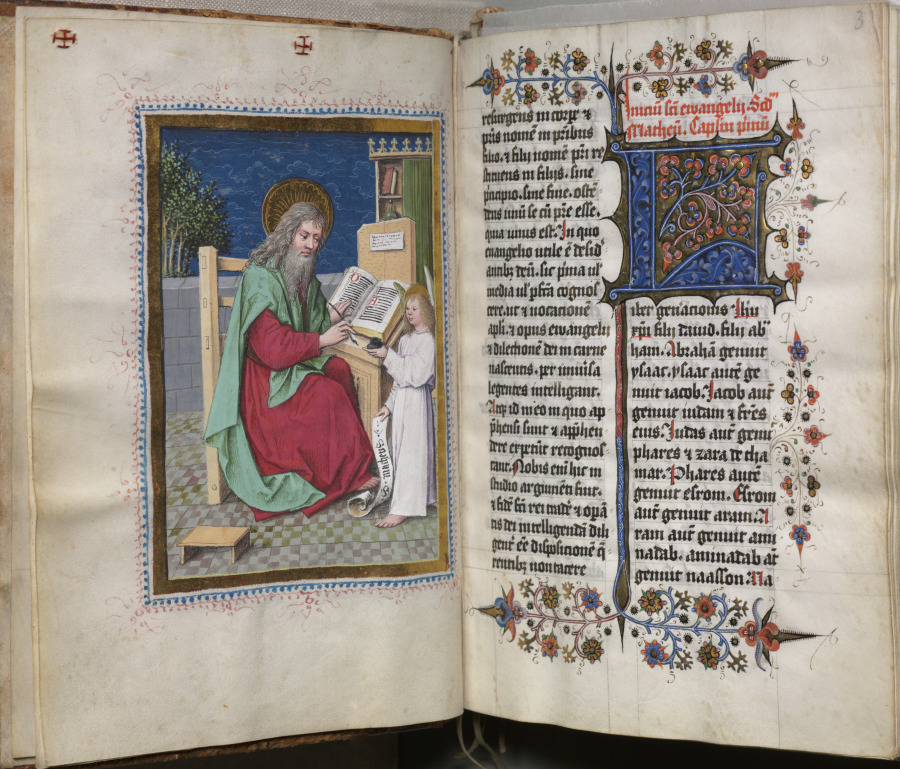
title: Gospel Book with Evangelist Portraits: Saint Matthew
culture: Germany, Middle Rhine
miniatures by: Master of the House-Book (German, c. 1470–1500)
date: c. 1480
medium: ink, tempera, and gold on vellum; original blind stamped leather binding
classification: Bound Volume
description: Each of the four gospels, here in Latin, are preceded by a full-page miniature of the appropriate Evangelist. As is conventional, the Evangelists are represented as contemporary scribes seated at a lectern surrounded by all the accouterments of the trade---inkpots, quill pens, penknives, etc. The miniatures' style is characteristically German late Gothic in its expressive use of angular drapery and realistic detail. Each miniature, however, bears the marks of The Hausbuch Master's hand: notice the terrace space for each figure and the emphasis on realistically rendered details, such as the furniture construction and the tools of the scribe as well as the facial types, with their heavy-lidded, downcast eyes. This artist was occasionally noted for his humor, as here in the portrait of the Evangelist John in which he depicted the saint erasing an error in his text with a pen knife in his left hand and a quill pen in his right. The skillful penwork, tracery, vine scrolls, and the large initials are the work of the other artists. The binding is original. The Hausbuch Master is known primarily for an album of lively drawings as well as some ninety copper engravings. He was also a panel painter of some distinction.